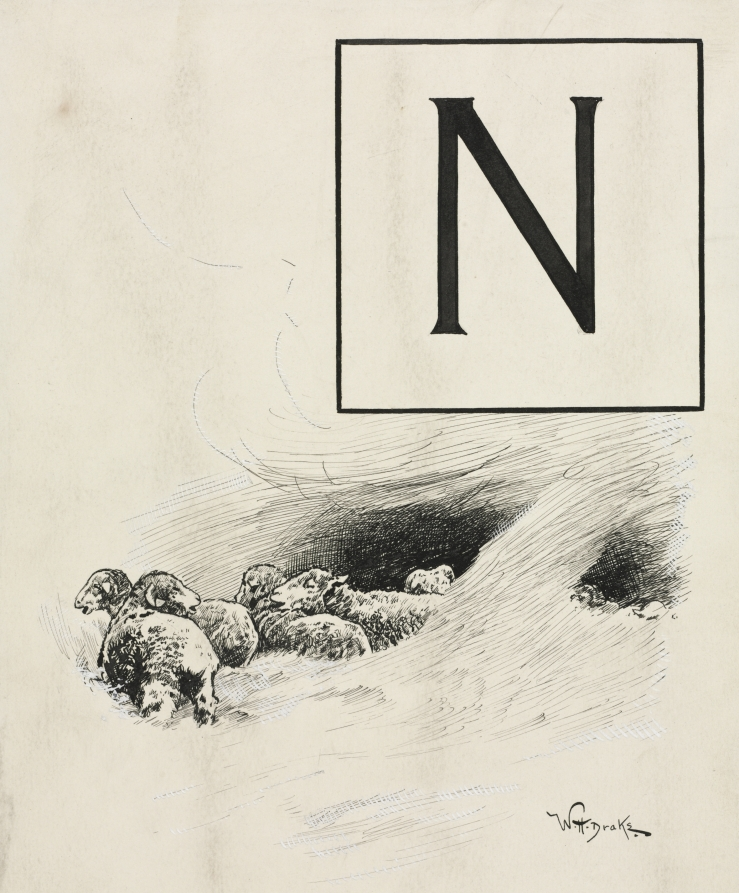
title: Inital N for Chapter L from "Lorna Doone"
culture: America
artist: William Henry Drake (American, 1856–1926)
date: c. 1889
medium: pen and ink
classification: Drawing